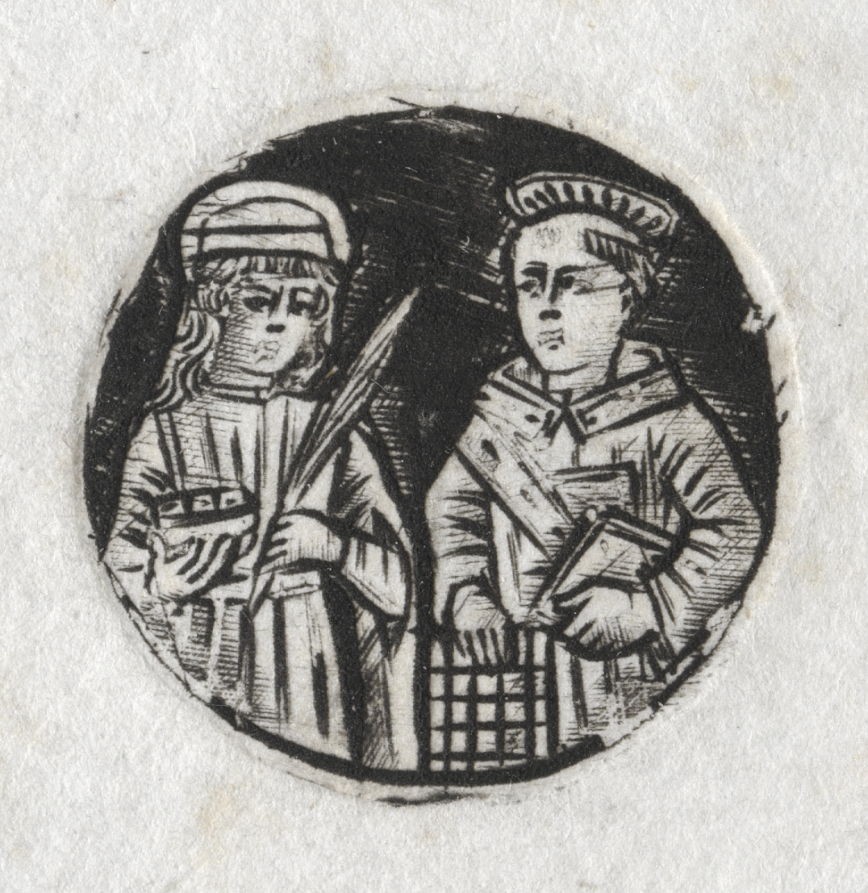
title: St. Lawrence and St. Lucy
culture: Italy, 19th century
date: c. 1487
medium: round niello engraving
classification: Print